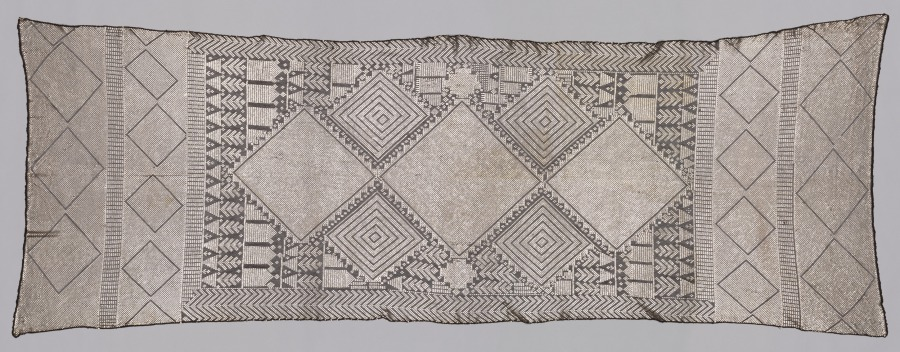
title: Scarf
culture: Africa, North Africa, Egypt, Assiut, Egyptian maker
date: early 1900s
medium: Probably cotton and silver-plated copper foil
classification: Garment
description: Egyptians may have innovated tulle-bi-telli (“net with metal,” also called assiut) after the French introduced machine-made netted fabric (tulle) in the late 1800s. It drew from telli, an earlier metal embroidery technique. Diamond and rectangle designs formed by knotting flattened silver wire into black tulle indicate this scarf’s early age in the genre. Urban Egyptian singers and dancers performed in heavy, shimmering tulle-bi-telli costumes during the late 1800s through the mid-1900s. Elite Egyptian city dwellers also wore it. Similar ones were sold at the 1893 World’s Columbian Exposition in Chicago and to tourists in Egypt, a possible origin for this example. In the US, tulle-bi-telli scarves were made into home decor and 1920s flapper-style clothing.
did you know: There is so much metal in this shawl that it weighs nearly 4.5 pounds.